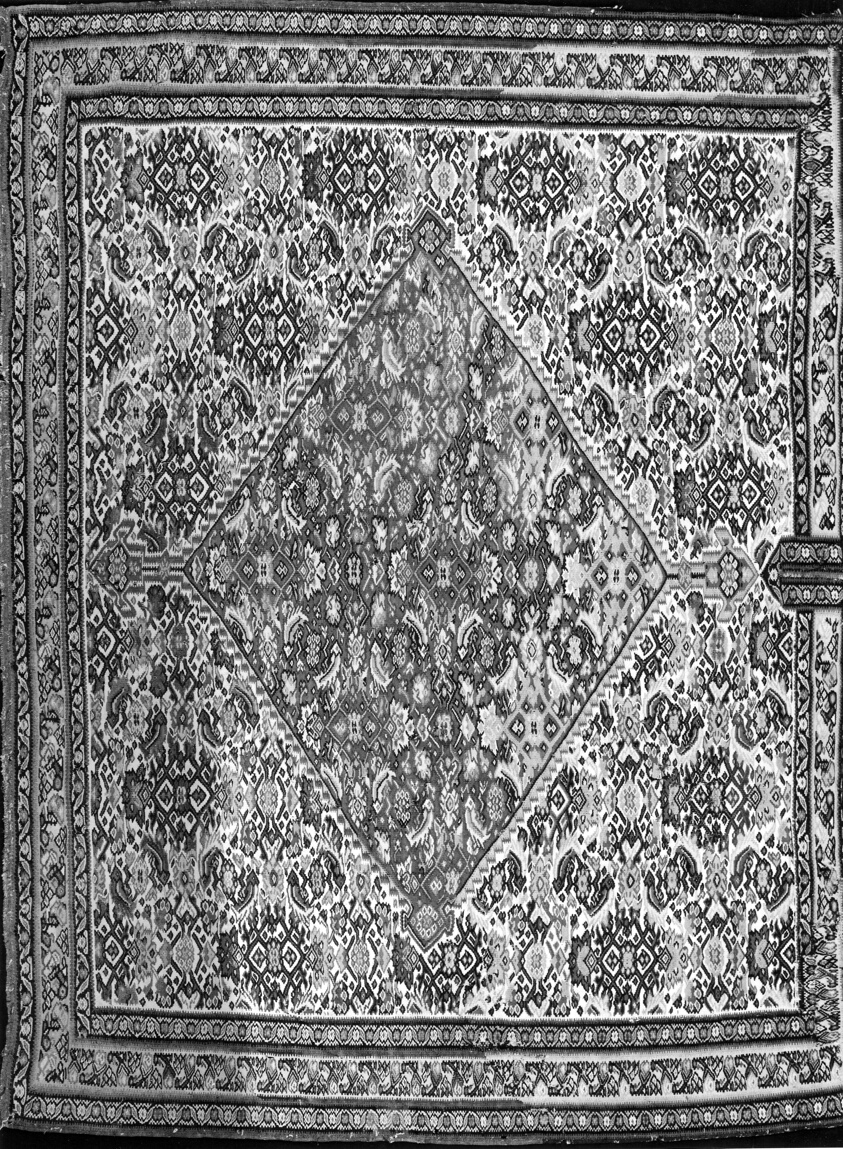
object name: Textile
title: Blanket (Altered from a Saddle Blanet)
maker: Iran, Kurdistan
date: 1875–1900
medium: Wool, slit tapestry weave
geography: Iran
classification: textile; weaving - carpet